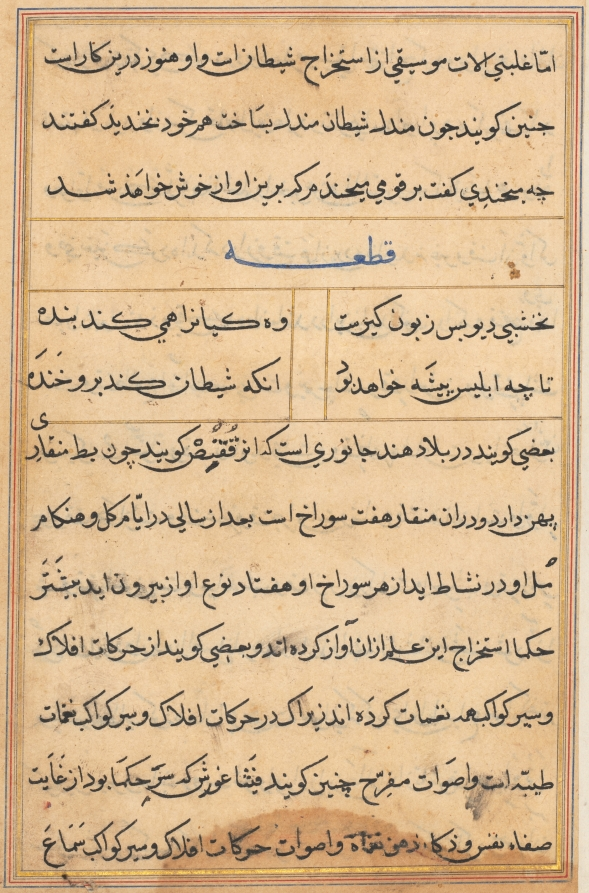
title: Page from Tales of a Parrot (Tuti-nama): text page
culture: Mughal India, court of Akbar (reigned 1556–1605)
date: c. 1560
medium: gum tempera, ink, and gold on paper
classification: Painting